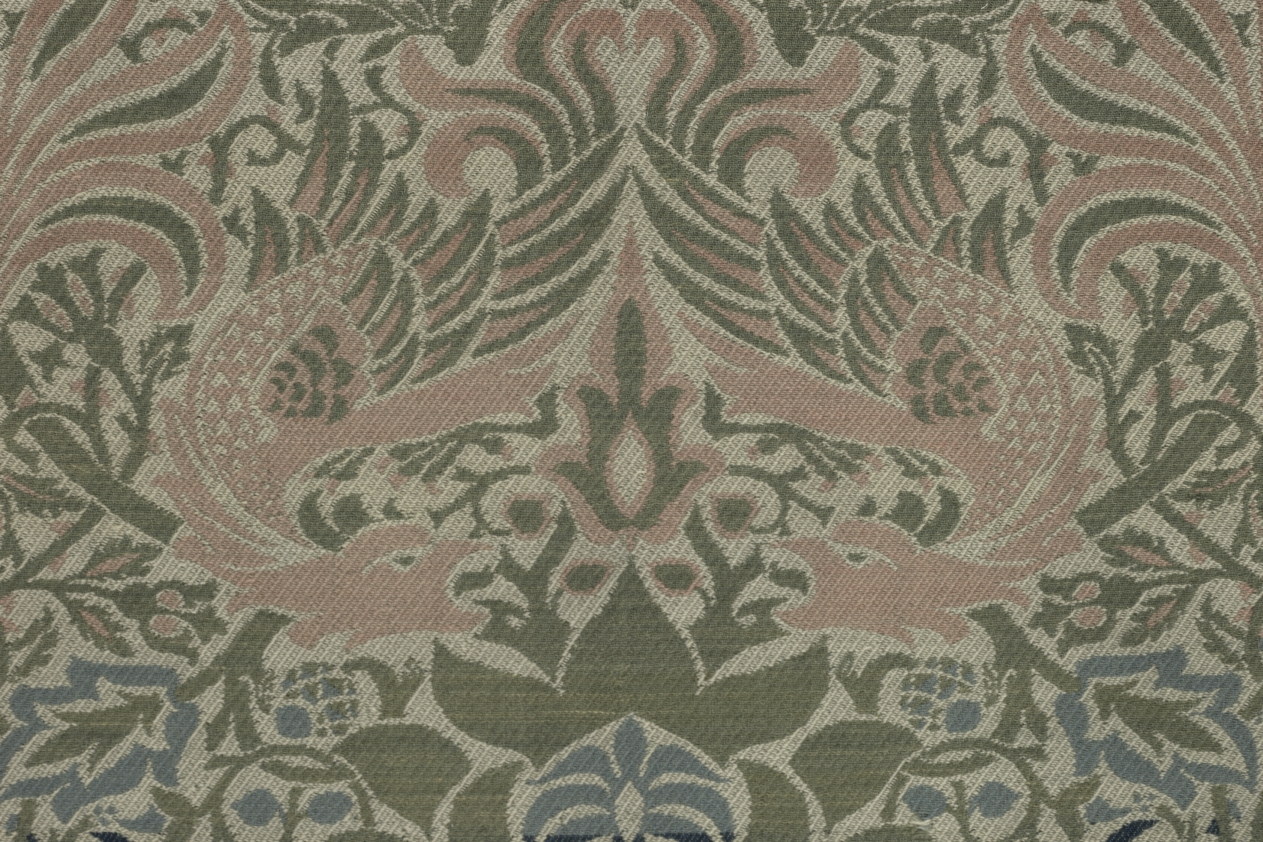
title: Peacock and Dragon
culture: England, Surrey, Merton Abbey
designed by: William Morris (British, 1834–1896)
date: 1878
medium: weft-faced compound twill; wool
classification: Textile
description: Morris sought to produce textiles that could function as he imagined medieval wall hangings had, bringing warmth to stone-cold rooms. Boldly designed with soothing colors in thick wool, Peacock and Dragon is the closest Morris came to achieving this ideal. In the same year he designed this textile, Morris visited the shop of the London dealer Vincent Robinson, where he saw a room re-created from Damascus, “all vermillion and gold and ultramarine, very beautiful, and is just like going into the Arabian nights.” It partly inspired the exotic motifs seen here. This design was one of the most popular among Morris’s customers; it was available in five colorways.